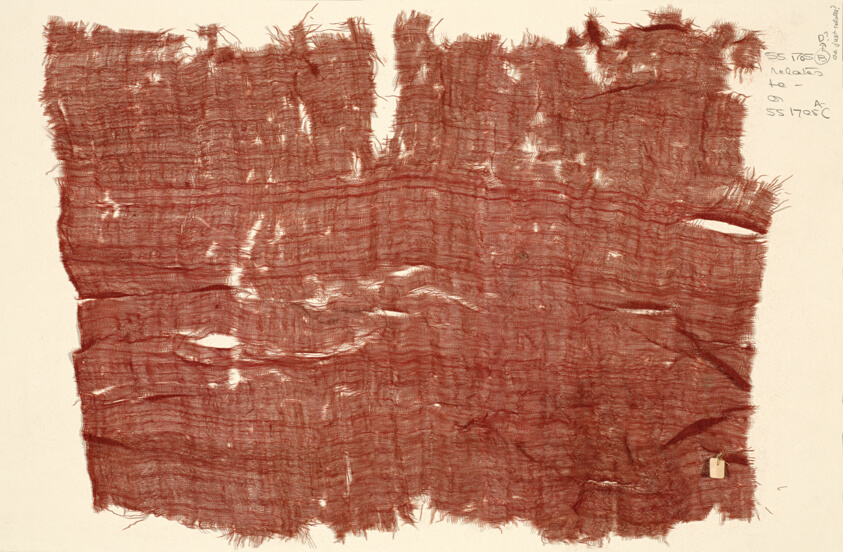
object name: Textile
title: Fragment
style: nazca, early intermediate period, Pre-Columbian, americas, andean, andes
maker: Peru, South Coast, Nazca culture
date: 200 B.C.–A.D. 600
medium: Cotton and camelid wool, slit tapestry weave with interlaced outlining wefts; edged with plain weave; parts of selvages present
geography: Peru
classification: textile; weaving